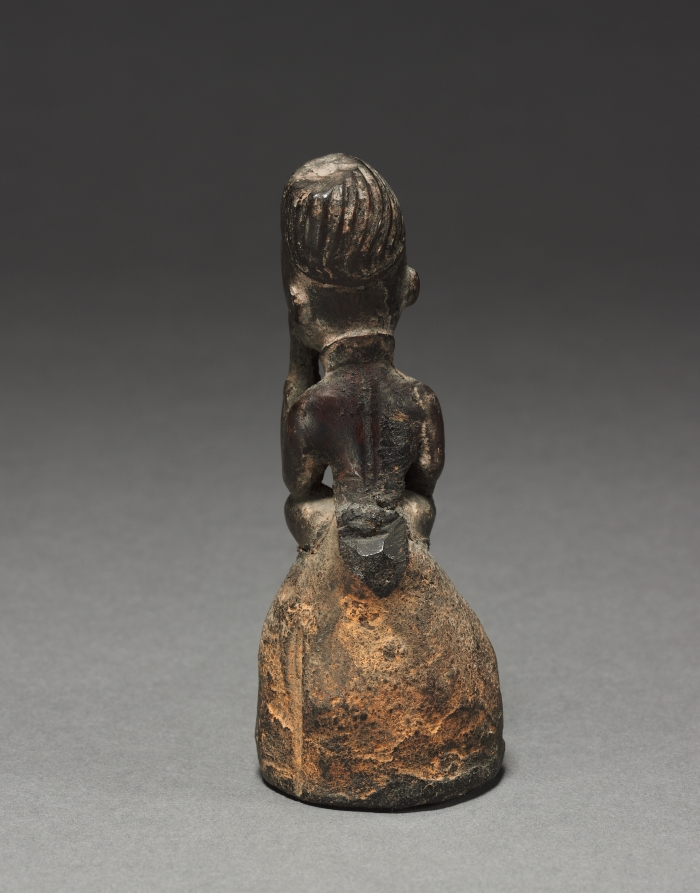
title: Power figure (nkisi)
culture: Africa, Central Africa, Republic of the Congo, Kongo-style maker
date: late 1800s-early 1900s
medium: Wood, organic materials (including resin), cloth, glass, and various other materials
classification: Sculpture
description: One of seven anthropomorphic figurines, these minkisi contained medicines in which an ancestral spirit was believed to reside. The medicines served a metaphorical rather than literal purpose in the resolution of conflicts among Kongo people. This asymmetrical figure wears a mpu headdress of chiefs with its characteristic geometric decoration. The pose may refer to a state of mourning.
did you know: Different from other Minkisi who hold their power in their abdomen, this figure sits atop a sphere in which the active substances still reside.